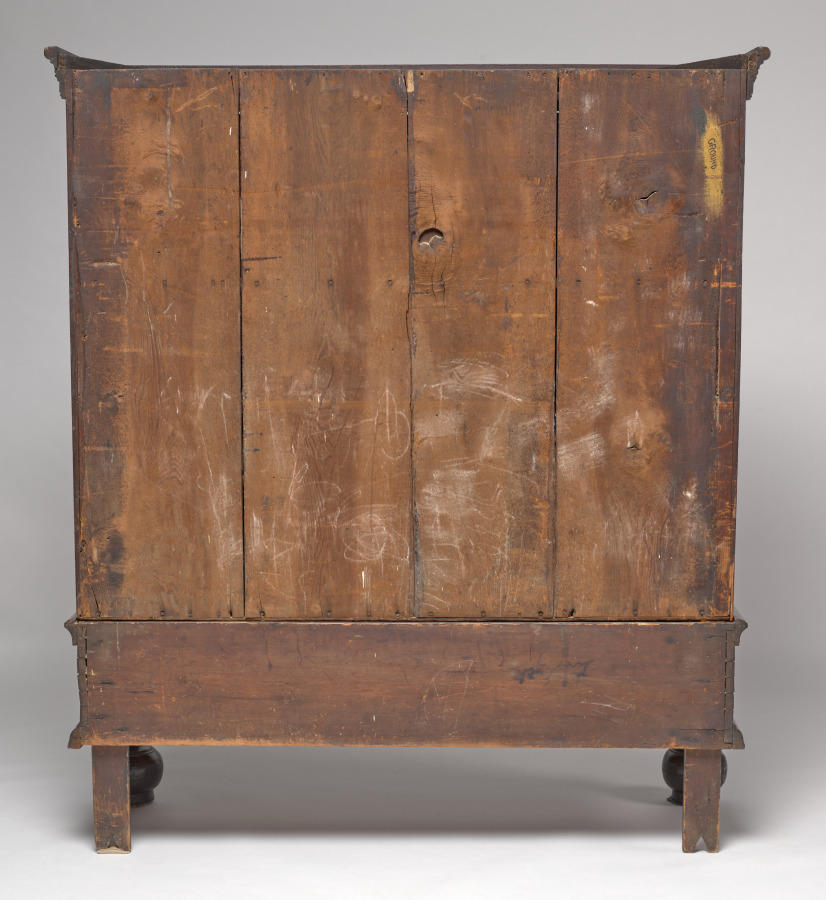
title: Kast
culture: American, King County, NY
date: c. 1710–1740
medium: Various woods, wrought iron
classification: Furniture and woodwork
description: The earliest furniture made in America often shared similarities with works made in the country from where the settlers originated. With its bun feet, paneled surface, and broad projecting cornice, this wardrobe (kast) resembles earlier Dutch examples that come from Amsterdam and its surrounding areas. Therefore, this wardrobe was likely made by the Dutch settlers who colonized New York and New Jersey.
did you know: This Dutch American wardrobe was likely made in a community along the Hudson River in New York by a cabinetmaker who had originally come from the region in or around Amsterdam in Holland.